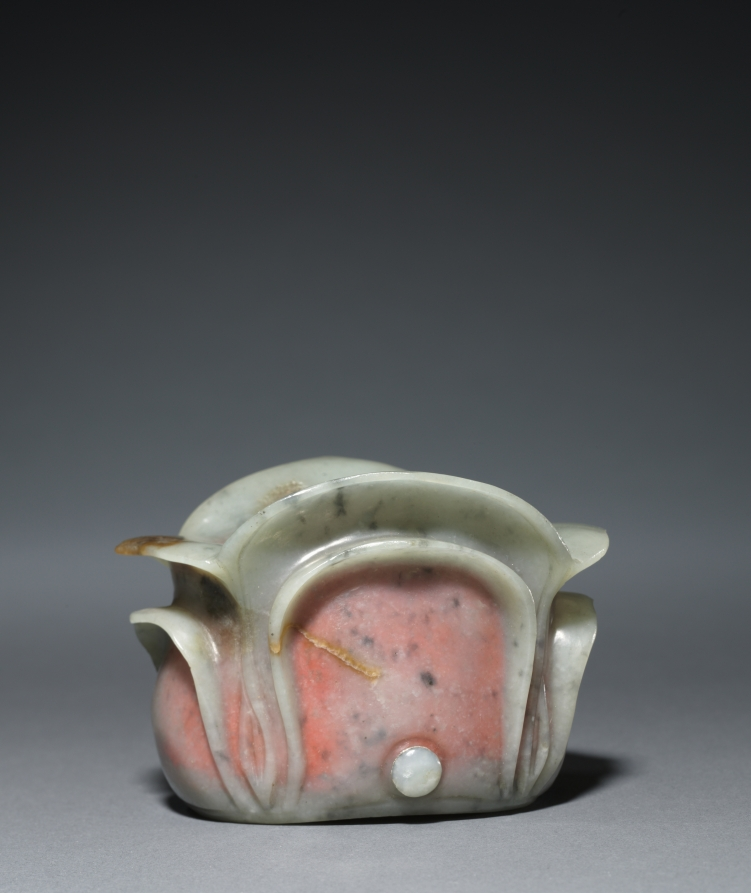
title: Daoist Cap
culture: China, Song dynasty (960-1279) - Yuan dynasty (1271-1368)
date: 960–1279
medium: grayish-green jade with brown and black markings; interior with pink pigment and gold inlays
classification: Jade